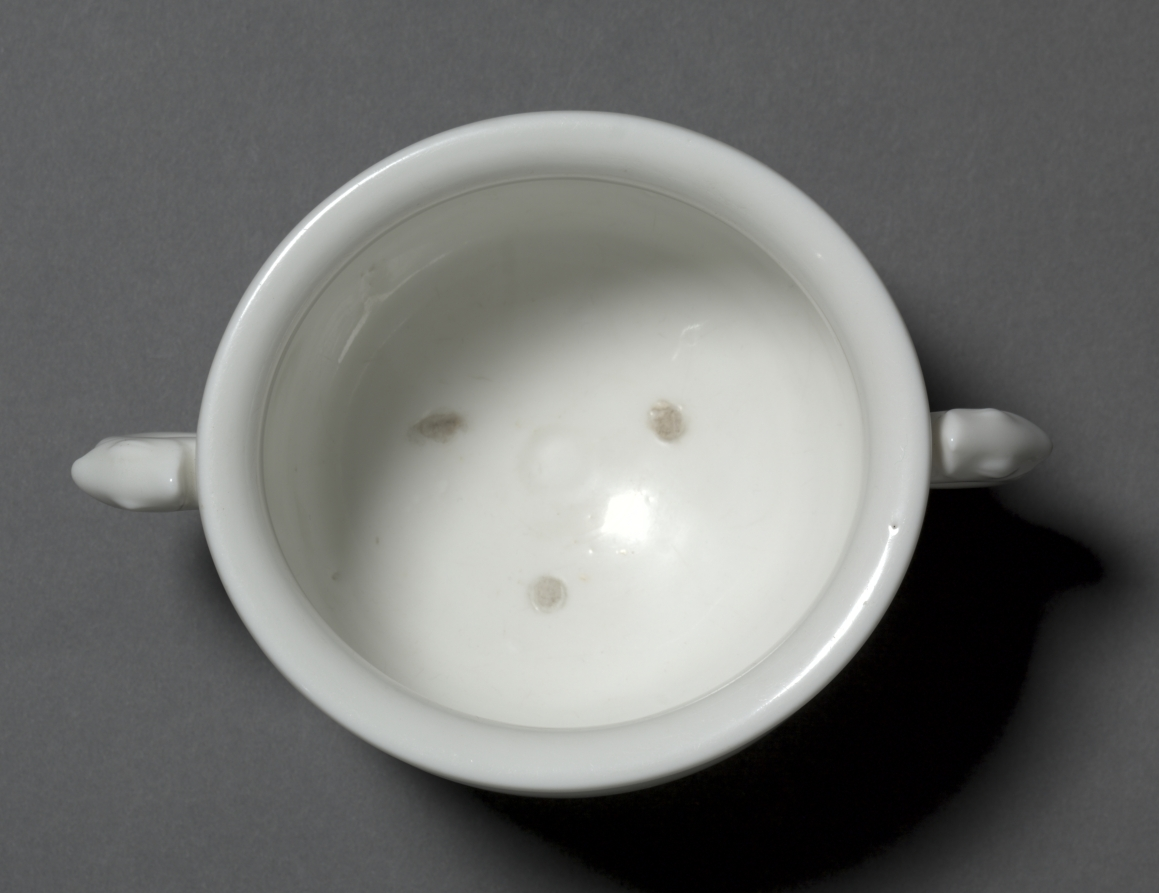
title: Incense Burner in the form of an archaic bronze vessel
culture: Chinese, Fujian province, Dehua, Ming dynasty (1368-1644)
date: 1600s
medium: Glazed white porcelain, Dehua ware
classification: Ceramic